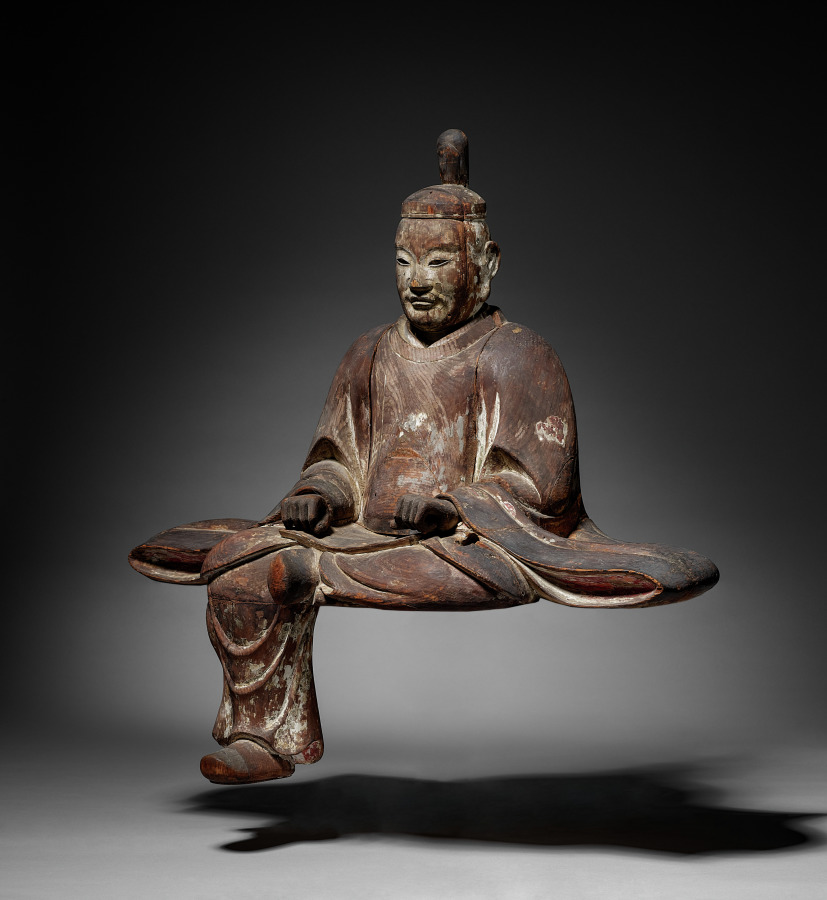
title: One of a Pair of Guardian Figures (Zuishin)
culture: Japan, Muromachi period (1392–1573) to Edo period (1615–1858)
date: c. 1560–1625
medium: Japanese cypress (hinoki) with traces of color; crystal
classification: Sculpture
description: Sculptors carved these two figures to look like members of the guard who protected the Japanese aristocracy in the 10th to 12th centuries. The pair belong in the roofed gate of a Shinto shrine. Their role was to embody the divine protectors of the deities, or kami, residing at the shrine. Their inset crystal eyes make them appear vigilant.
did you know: Some Japanese sculptors used to specialize in inset crystal eyes.